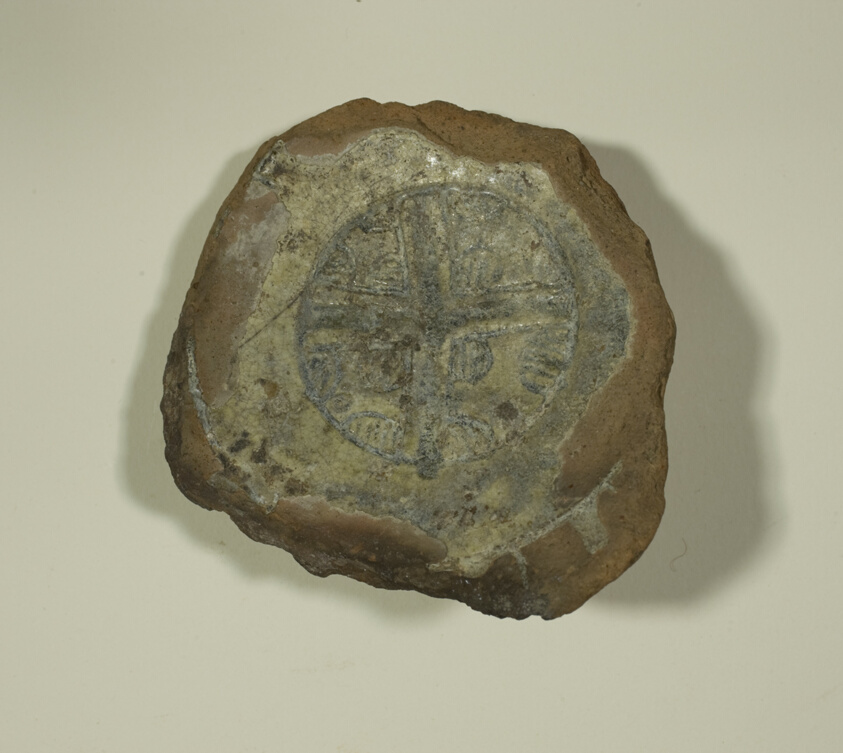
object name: Decorative Arts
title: Fragment of a Bowl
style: byzantine, european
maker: Byzantine, Asia Minor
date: 13th-14th century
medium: Ceramic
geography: Istanbul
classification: fragment; ceramics; vessel; bowl; asian art; decorative arts